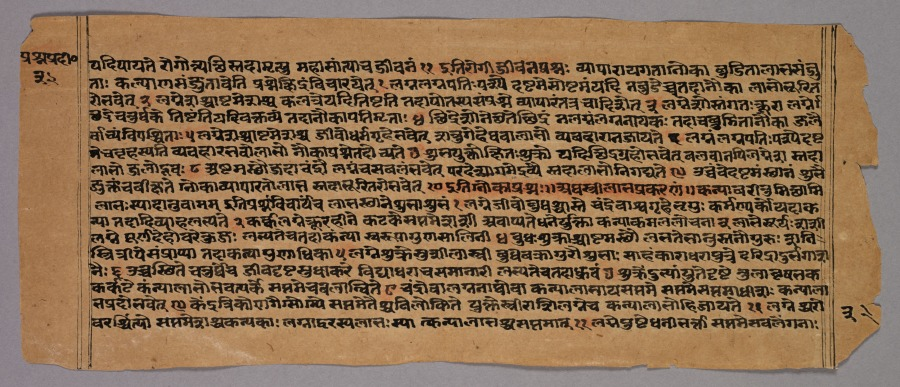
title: Page from the Prasnapradipa, a Hindu Astrology Text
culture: Western India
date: 1500s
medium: ink on paper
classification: Manuscript